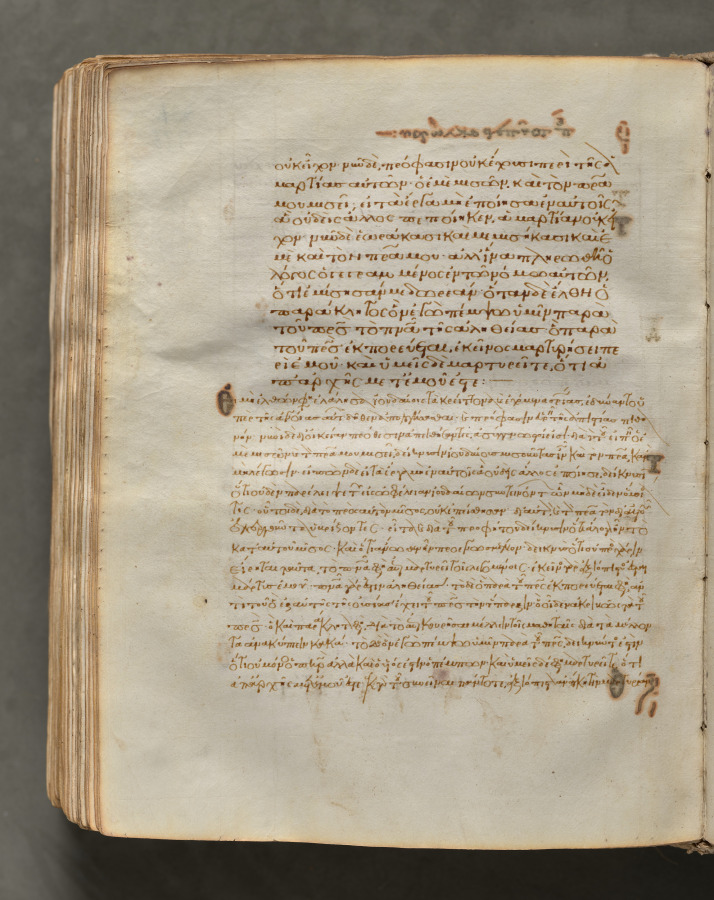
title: Text, folio 398 (verso), from a Gospel Book with Commentaries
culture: Byzantium, Constantinople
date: c. 1000–1100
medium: ink, tempera, and gold on vellum; leather binding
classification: Bound Volume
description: Each of the four gospels in this book opens on a page with brilliantly illuminated borders depicting the author of the text as well as birds—principally peacocks, symbols of the immortality of the soul—and fountains, representing the fountain of life and the salvation of the soul. This volume consists of 428 leaves with texts in Greek. Its level of sophistication suggests that it was probably written and decorated in a monastery in Constantinople.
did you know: Gospel books were carried in procession through Byzantine churches.